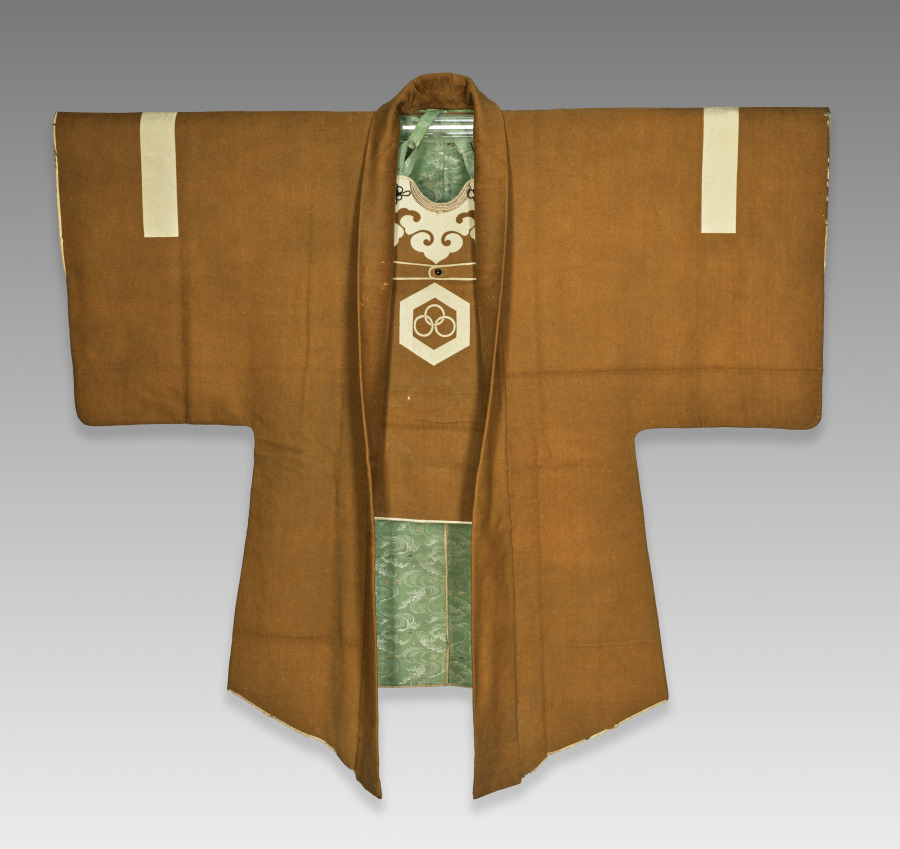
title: Firefighter's Suit (Kaji shōzoku)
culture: Japan, Edo period (1615–1868)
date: late 1700s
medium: Wool (rasha); applique and silk and gold thread cord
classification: Textile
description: Wood architecture in densely populated areas made firefighting a frequent occurrence in the Edo period (1615–1868). Jackets made of leather or wool offered firefighters protection against the flames. Wool was imported from Europe. The triple ring crest in white is of the “three alternating rings” (mitsurin chigai) type framed in a tortoise shell (kikko) motif, and identified the house with which the wearer was affiliated.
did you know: Wool has self-extinguishing properties that protect the wearer from fire.